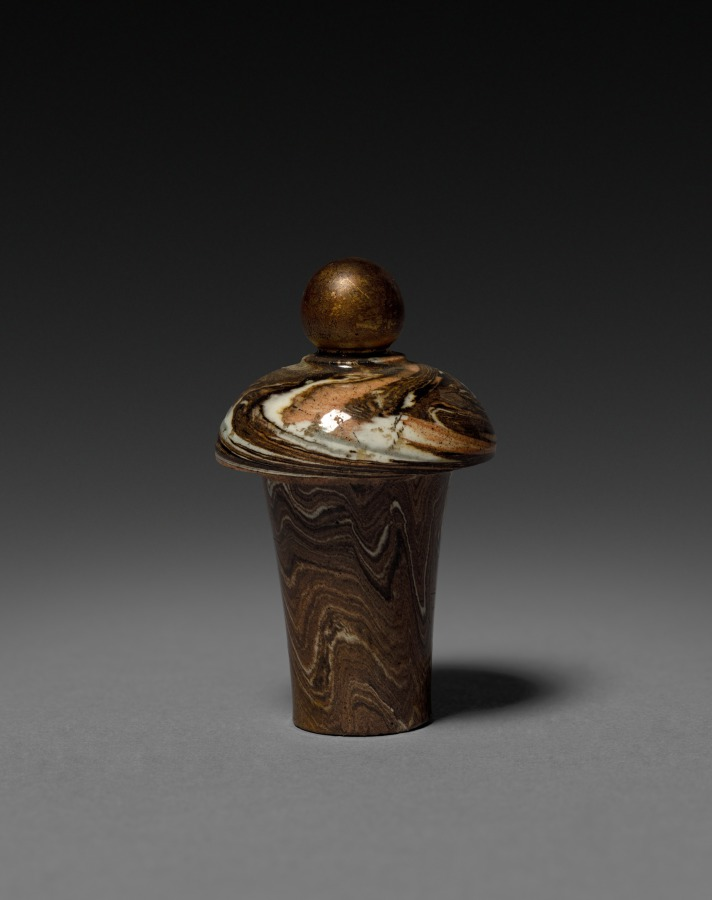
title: Urn (lid)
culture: England, late 18th or 19th century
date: late 1700s - 1800s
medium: earthenware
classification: Ceramic